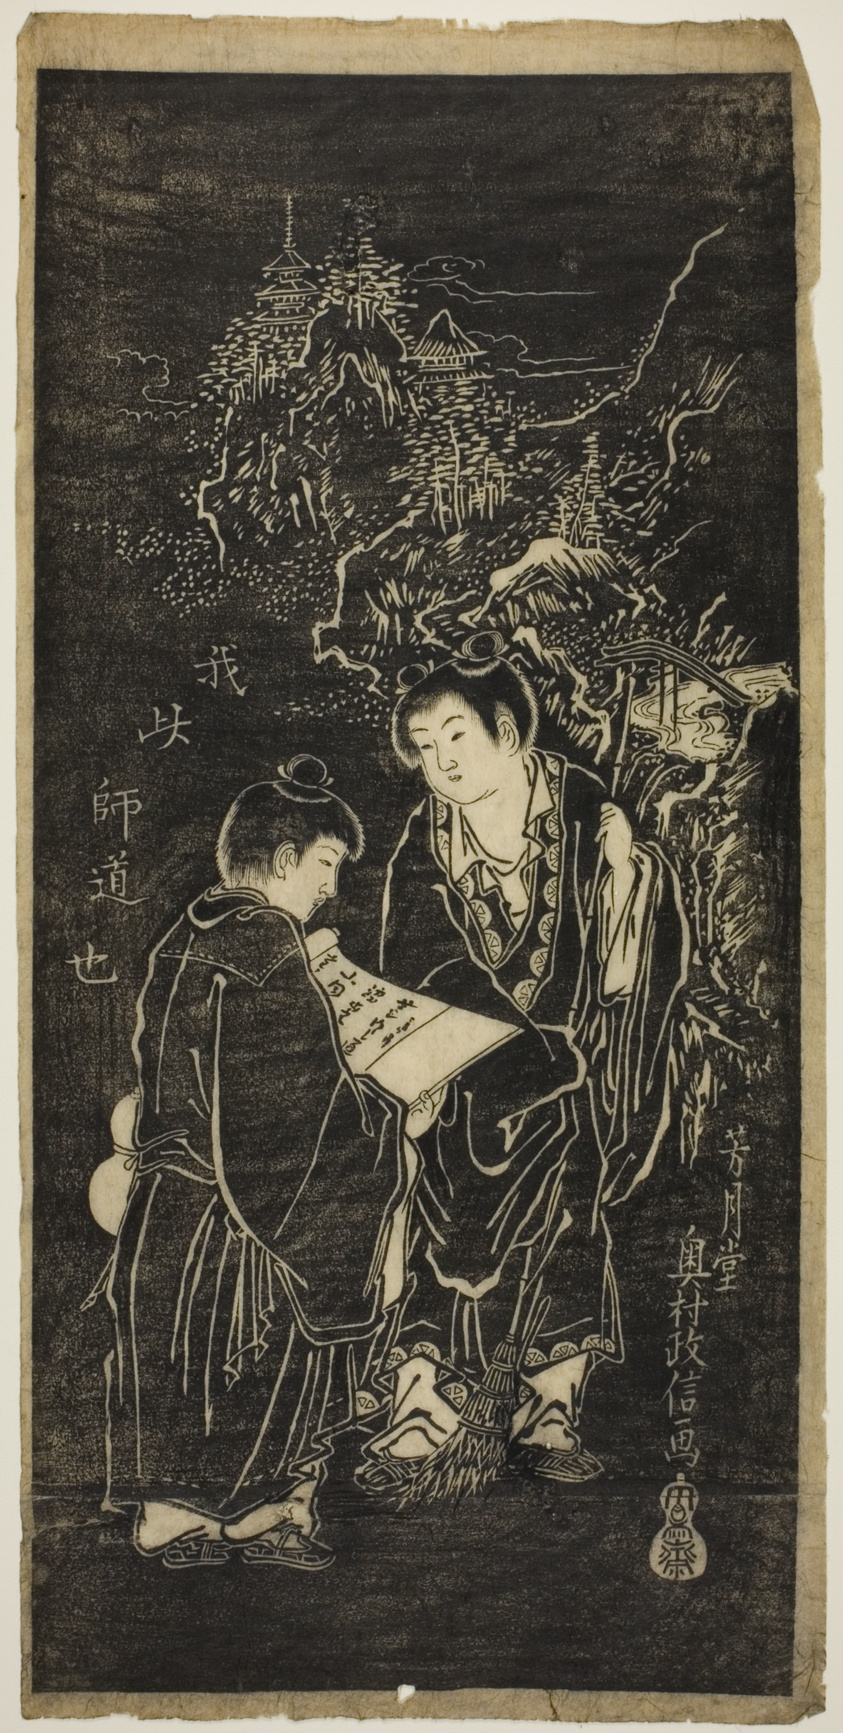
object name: Print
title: Two Boys as the Eccentric Monks Kanzan (Chinese: Hanshan) and Jittoku (Chinese: Shide)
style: Japanese (culture or style)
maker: Okumura Masanobu (Japanese, 1686-1764)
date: 18th century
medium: Woodblock print; hosoban, ishizuri-e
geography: Japan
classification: woodblock print; print; asian art; woodblock